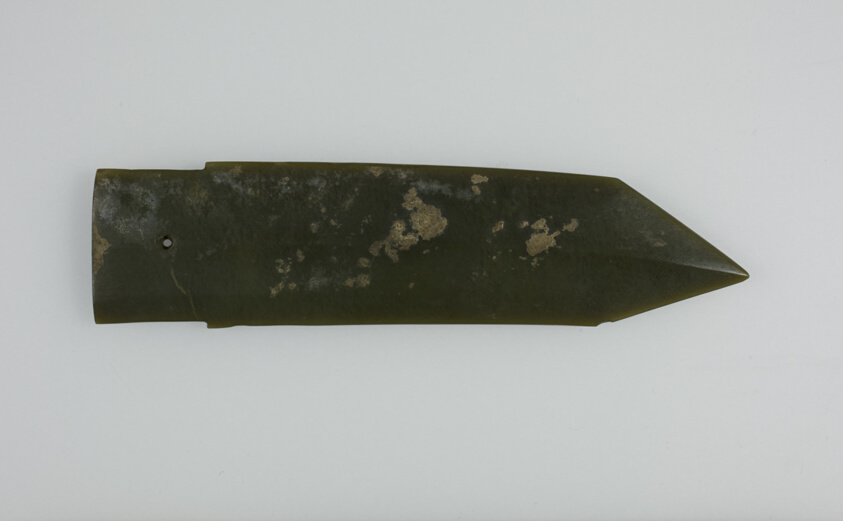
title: Dagger-Axe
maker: China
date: Shang dynasty (c. 1600–1046 B.C.)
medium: Jade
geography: China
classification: jade; asian art